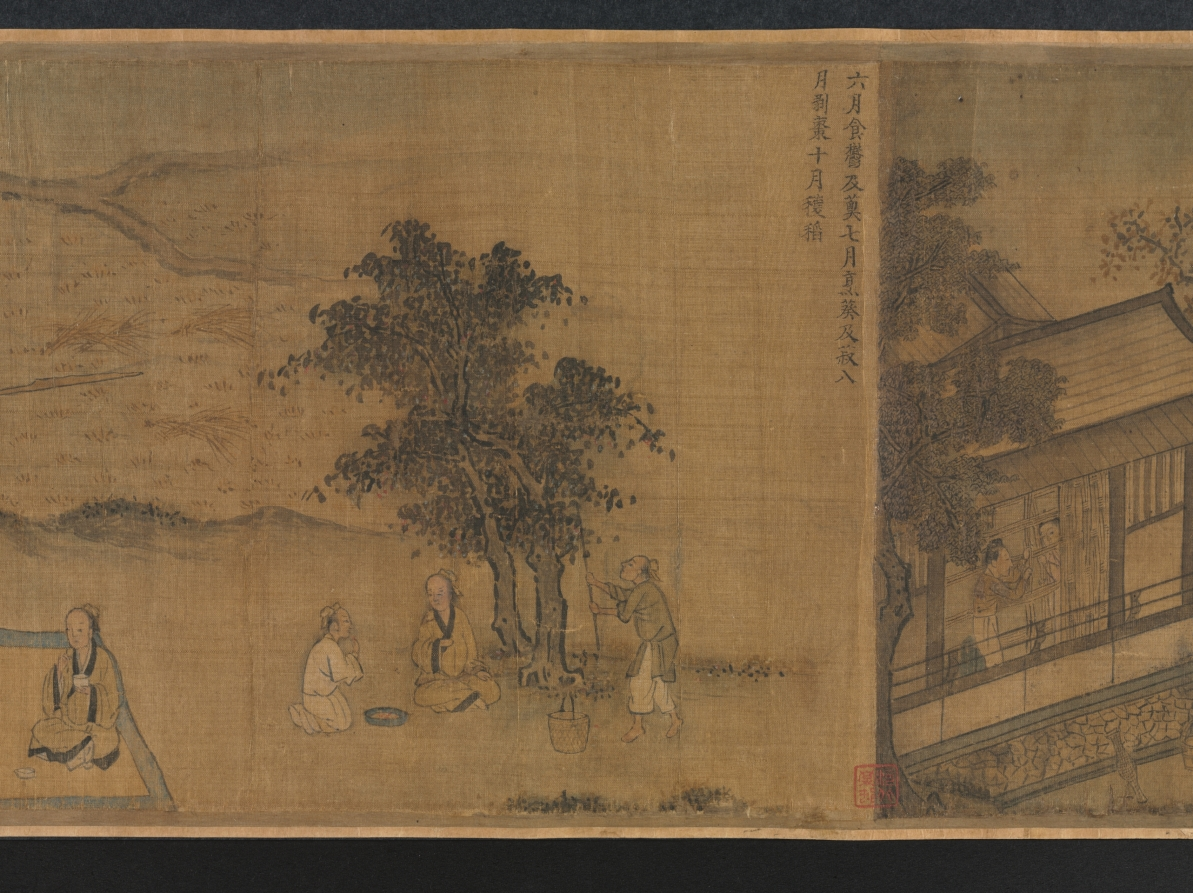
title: "Seventh Month" from the Odes of Bin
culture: China, Southern Song dynasty (1127-1279)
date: 1200s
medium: Handscroll; ink and color on silk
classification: Painting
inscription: Colophons: 1. [on the frontispiece] by the Qianlong emperor (dated 1741). 2. by Lu Wan (dated Zhengde dingchou, 1517). 2. by the Jiaqing emperor (dated 1807).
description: According to Confucian thought, the ruler looks after the well-being of his people which involves agricultural activities. Seventh Month from the ancient Odes of Bin in the Shijing (Book of Poetry) describes occupations throughout the year, including plowing, harvesting, hunting, making clothes, and observing rituals. The earliest illustrations of these Odes accompanied by text were commissioned by Southern Song emperor Gaozong (reigned 1127–1162). As the lower Yangzi delta had become the new seat of government, Gaozong had sets of these illustrations produced by court artists to revive the dynasty and convince the Confucian officialelite of his legitimacy to rule.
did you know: The Odes of Bin appears in the classic Shijing (Book of Poetry), an anthology of more than 300 poems, folk songs, and ceremonial hymns that were originally chanted to music.